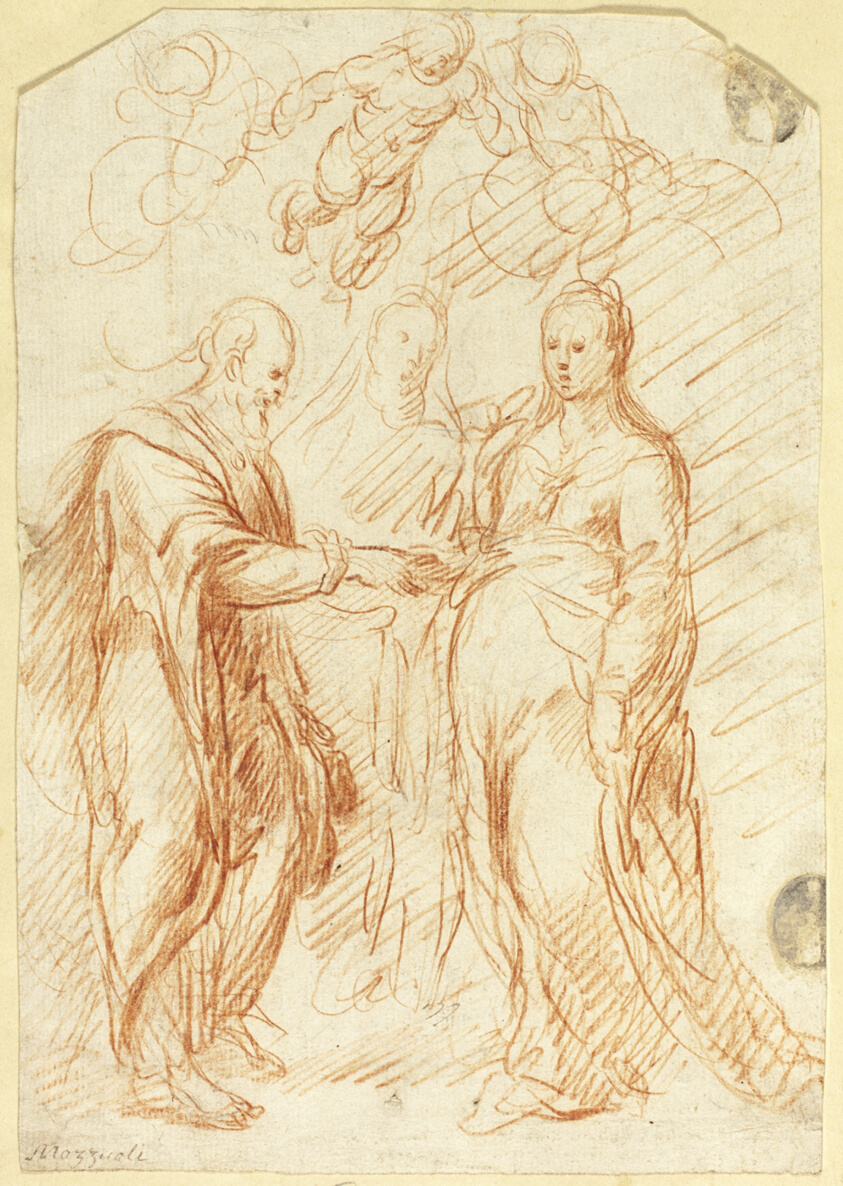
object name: Drawing and Watercolor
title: Marriage of the Virgin (recto); Sketches of Lower Half of Face in Profile (verso)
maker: Unknown Artist (French, n.d.); or after Parmigianino (Italian, 1503-1540); or style of Cristoforo Roncalli (Italian, 1552-1626)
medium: Red chalk on gray prepared ground (recto) and pen and brown ink over graphite (verso) on ivory laid paper, tipped onto tan wove paper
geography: France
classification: chalk; drawings (visual works); prints and drawing